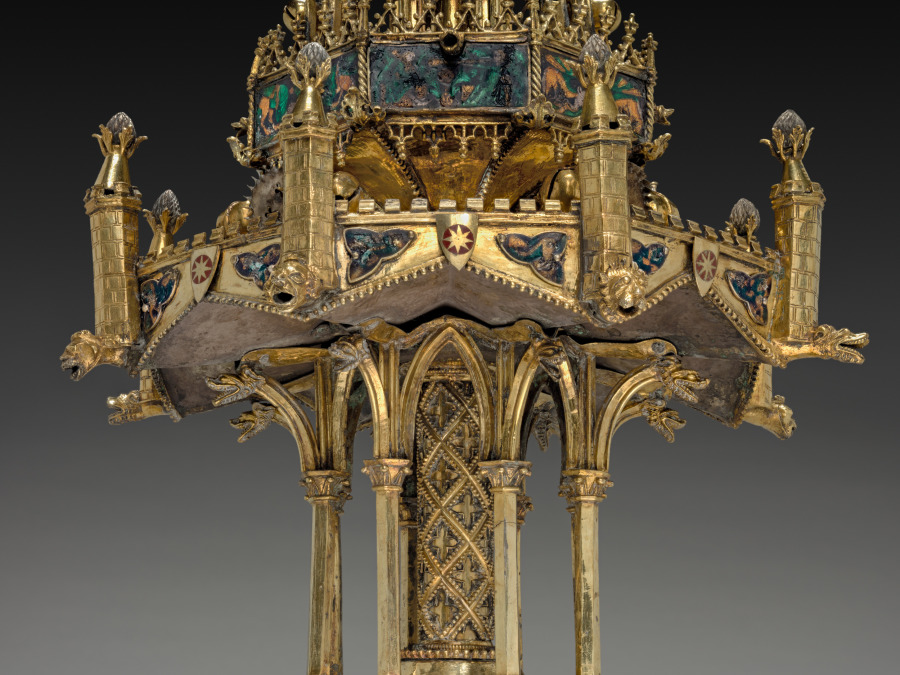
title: Table Fountain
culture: France, Paris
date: c. 1320–40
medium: gilt-silver and translucent enamels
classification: Metalwork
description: Conceptually and stylistically, this object is beyond all else a piece of Gothic architecture in miniature with vaults, pinnacles, columns, and traceried arches. Though the artist who created it is unknown, he was unquestionably inspired by the great Gothic buildings of his time. The table fountain is a three-tiered assembly combining cast elements with bent sheets of gilt-silver. To these have been attached a series of enamel plaques representing grotesque figures, some of which play musical instruments. Water wheels and bells were added to capture motion and sound. The rich detail, precious materials, and involved ornamentation of this deluxe object suggest it would have been expensive to produce and highly treasured by its original owner, someone of high status, and would have been deployed as an object of spectacle. This is the most complete example of its type known to survive from the Middle Ages. Medieval inventories reveal that small fountains like this, often taking various forms, and generally made from precious metals, once existed in large numbers, thus making the Cleveland table fountain an extremely rare object.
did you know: This fountain with its minute architectural details and finely made enamel plaques displayed the wealth and refinement of the owner as it entertained his guests. Imagine hearing the ringing of the tiny bells when this fountain was in use.